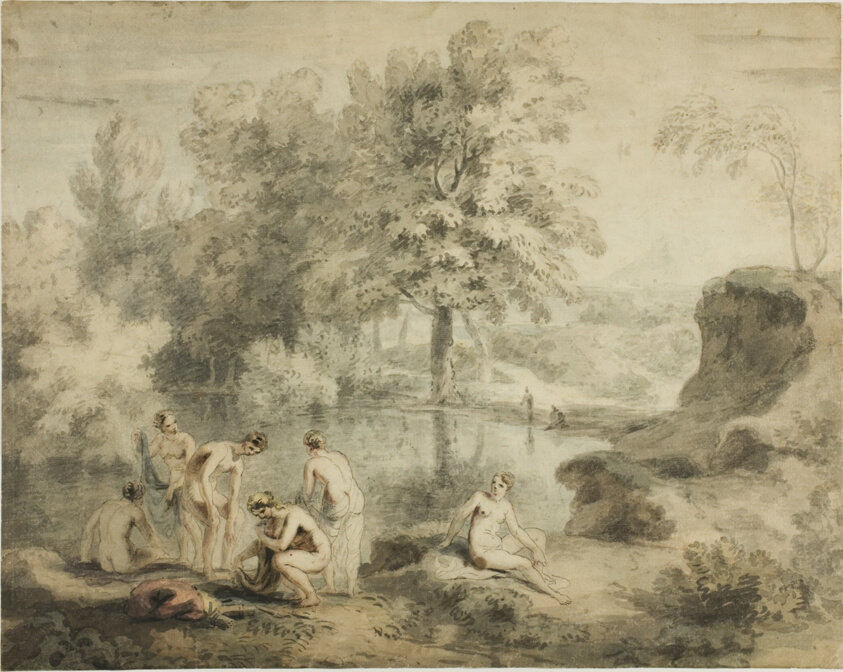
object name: Drawing and Watercolor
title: Women Drying Selves by Pond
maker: John William Taverner (English, 1703-1772)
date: 1740/50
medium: Watercolor and gouache, over traces of graphite, on tan laid paper, laid down on tan laid paper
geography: England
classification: watercolor; drawings (visual works); prints and drawing